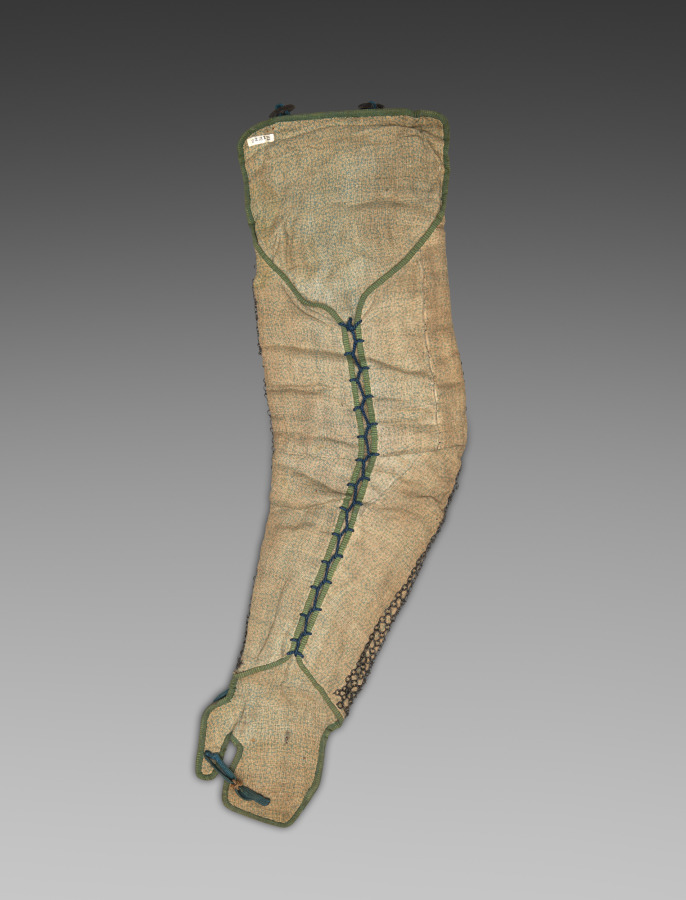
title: Armored Sleeve (Kote)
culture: Japan, Edo period (1615–1868)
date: 1615–1868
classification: Arms and Armor